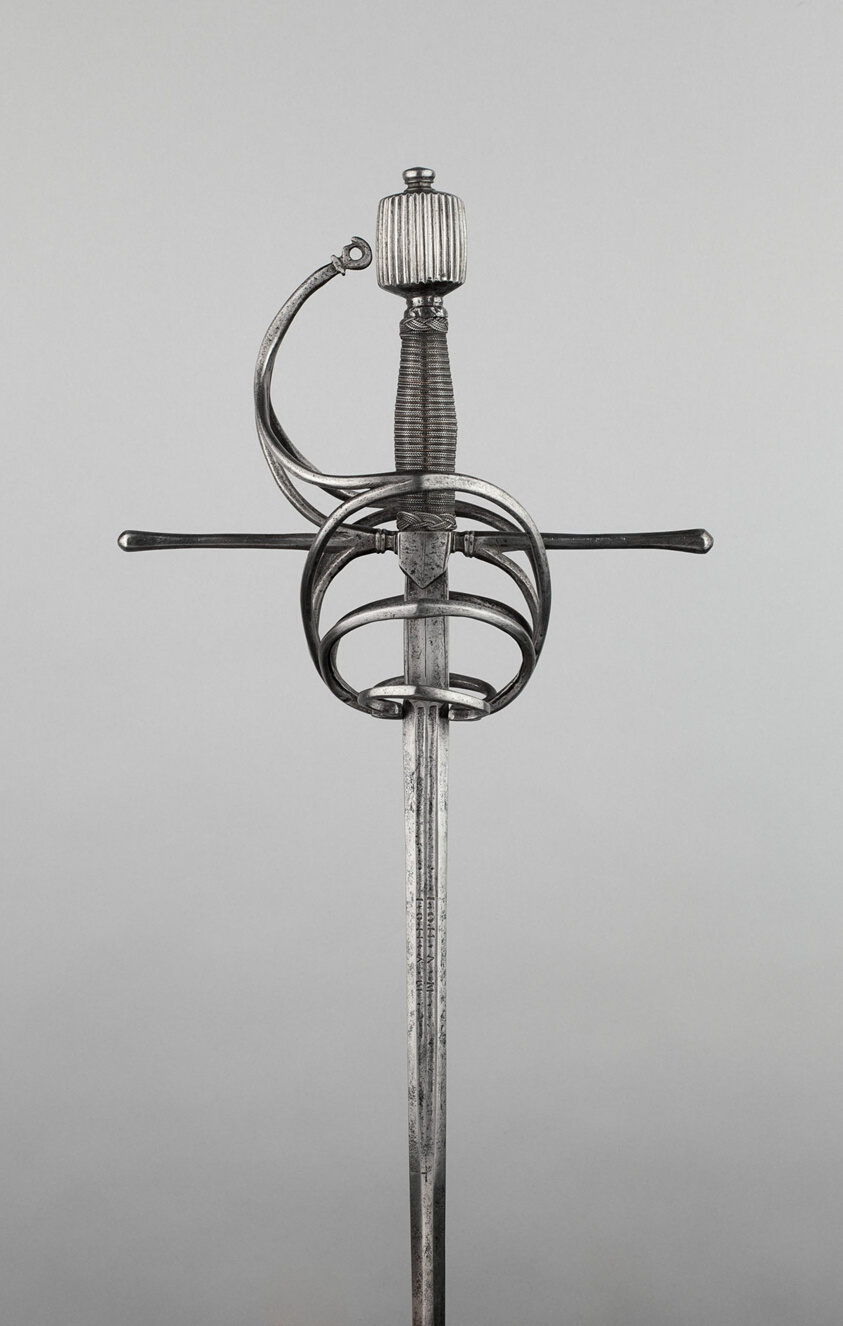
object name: Arms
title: Rapier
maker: Probably Italian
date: 1610-20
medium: Iron, steel, copper, and wood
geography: Italy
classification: edged weapon-sword; arms; arms and armor